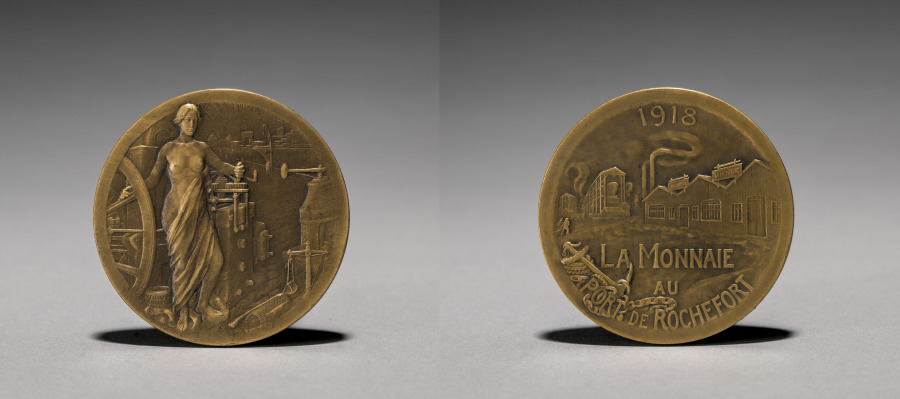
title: Medal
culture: France, 20th century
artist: Edmond-Eugene-Emile Lindauer (French, 1869–1942)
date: 1918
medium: bronze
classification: Metalwork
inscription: reverse - "La Monnaie au Port de Rochefort"